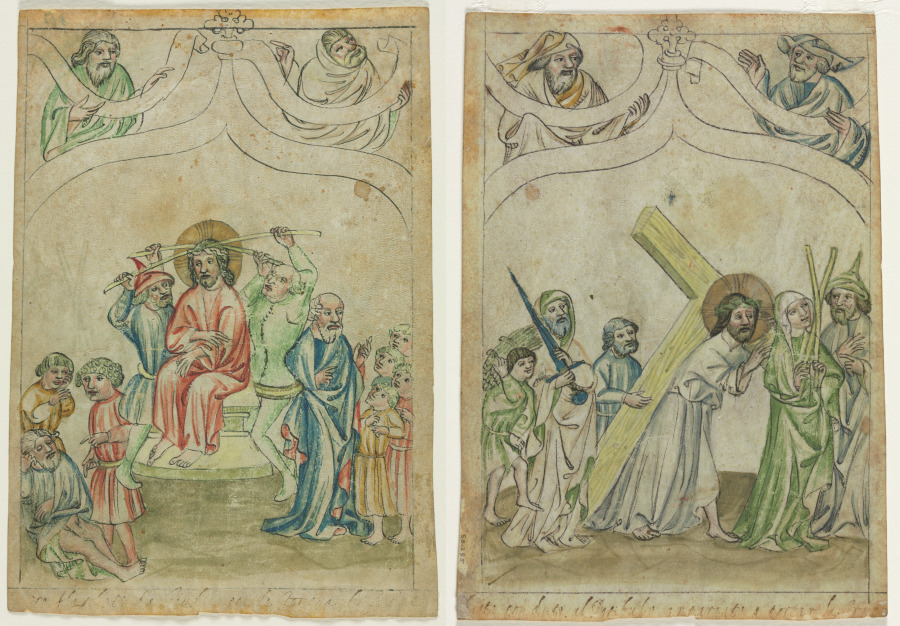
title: Single Leaf from a "Biblia Pauperum": Christ Crowned with Thorns (recto) Christ Carrying the Cross (verso)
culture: Germany, Bavaria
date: c. 1410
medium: ink and tempera on vellum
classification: Manuscript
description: Also known as the "Poor Men's Bible," the Biblia Pauperum was a simple picture book used to explain biblical prophecies and symbolism. These volumes served as an aid for preachers to demonstrate the unity of the Bible. The iconography of these popular books juxtaposed two Old Testament scenes with one from the life of Christ. In this example, the image of Christ crowned with thorns on one side and Christ carrying the cross between Abraham and Isaac on the way to sacrifice (on the left) and Elijah with the widow of Zarephath (right), on the other side. The Biblia Pauperum appeared first in manuscript form in the 1200s, became a popular picture book with miniatures in the 1300s, and after 1450 it emerged as a print book with woodcuts.